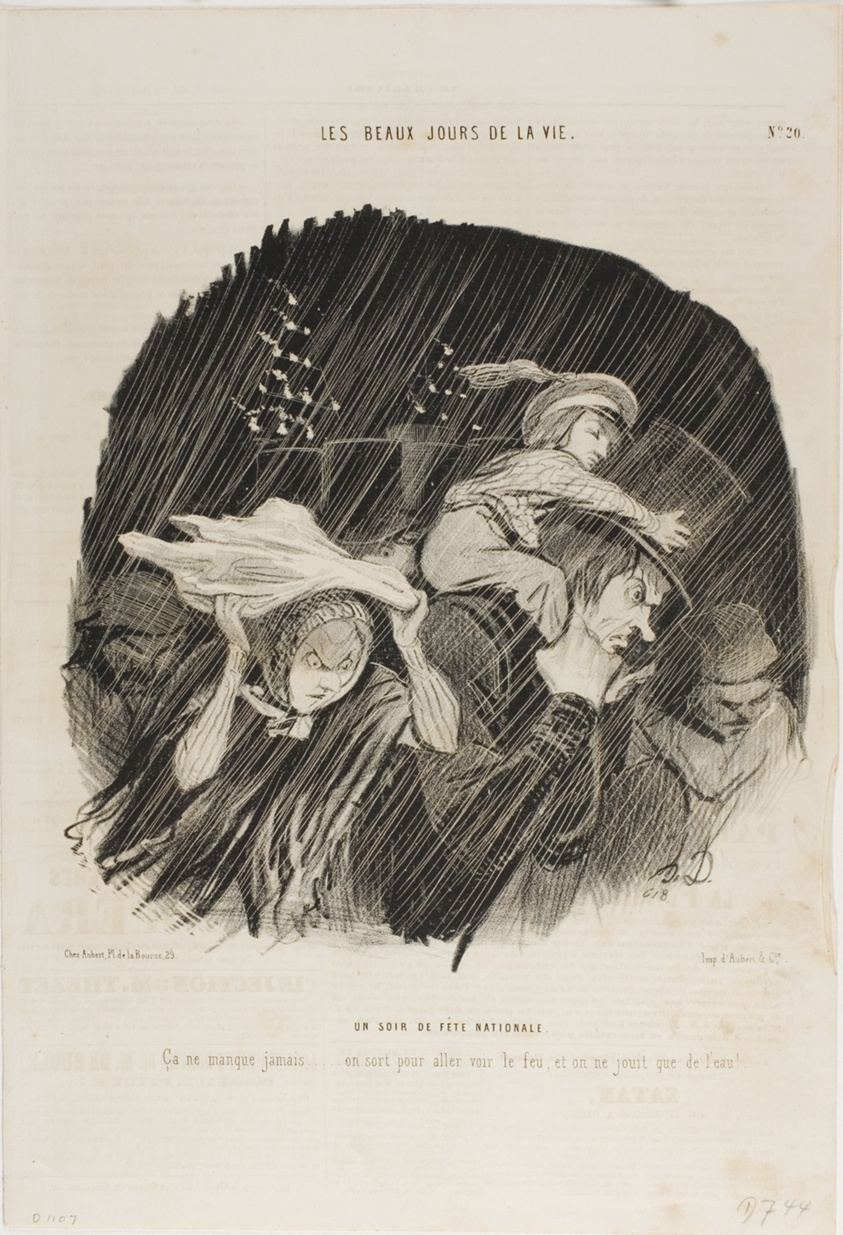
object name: Print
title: The Evening of the National Holiday. It never fails... you go out to see the fireworks, and all you get is waterworks!, plate 20 from Les Beaux Jours De La Vie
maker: Honoré Victorin Daumier; French, 1808-1879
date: published August 21, 1844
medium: Lithograph in black, with scraping on stone on cream wove paper (sheet folded to form four pages), with text added in another hand and letterpress verso (and recto when unfolded)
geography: France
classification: lithograph; print; prints and drawing